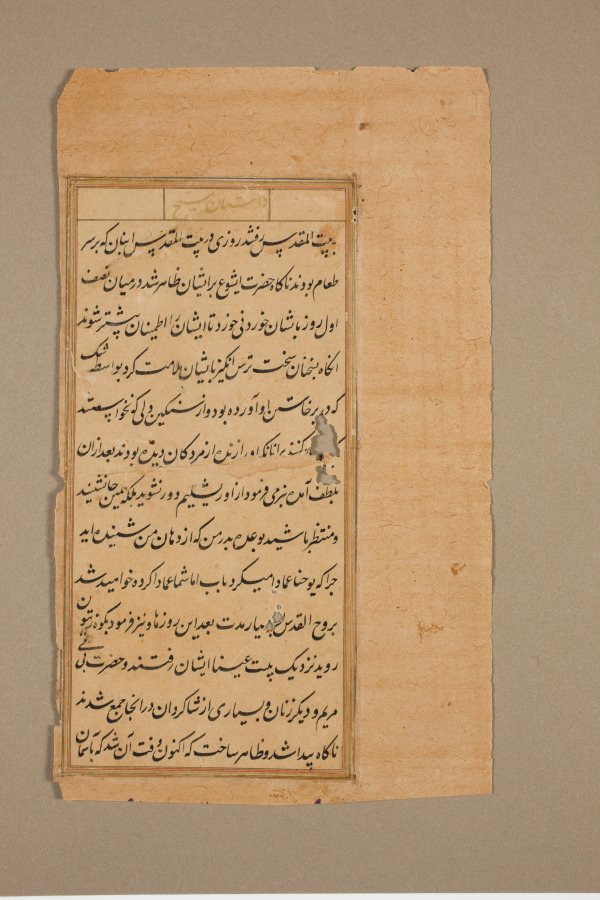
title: Text page from a Mirror of Holiness (Mir’at al-quds) of Father Jerome Xavier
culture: Mughal India, Allahabad, made for Prince Salim (1569–1627)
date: 1602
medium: Ink and gold on paper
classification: Manuscript